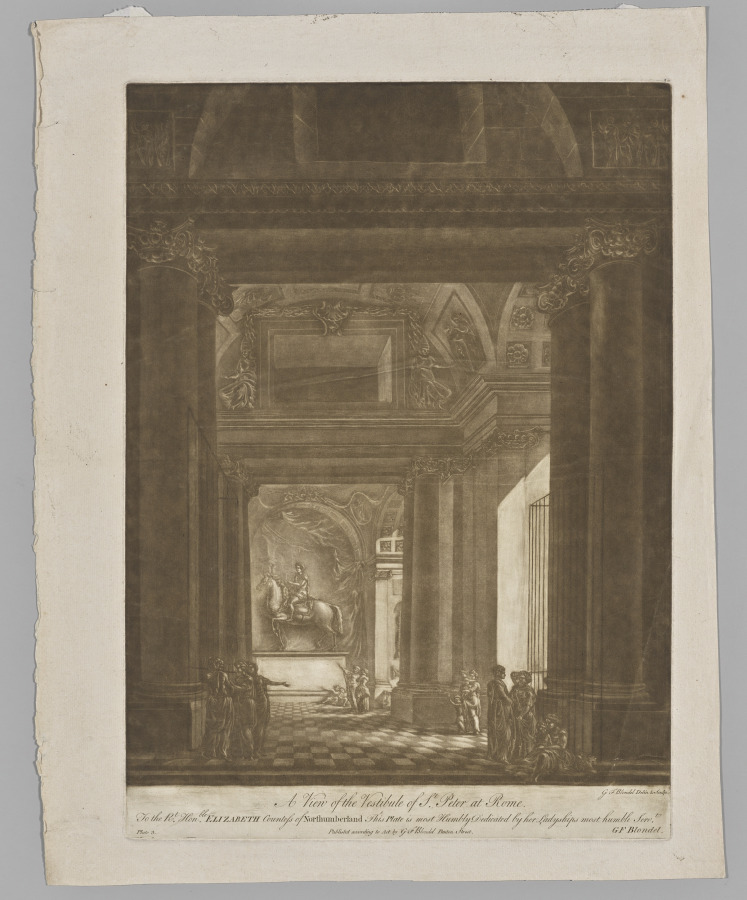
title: A View of the Vestibule of St. Peter at Rome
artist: Georges Francois Blondel (French, 1730–1800)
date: 1766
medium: mezzotint printed in sepia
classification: Print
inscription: Imprinted on recto: “A View of the Vestible ulf St. Peter at Rome”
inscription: Imprinted on recto: “G F Blondel Delin & Sculp”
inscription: Imprinted on recto: “To the Rt Hon’ble Elizabeth Countess of Northumberland This Plate is most Humbly Dedicated by her Ladyships most humble serv’t/Published according to Act by G F Blondel Panton Street/G F Blondel/Plate 3”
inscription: Watermark: Grand-Jésus stock of T. Dupuy, watermark Name of Jesus (IHS), countermark T Dupuy Fin Auvergne 1742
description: After returning from several years spent in Italy, the French printmaker George-Francois Blondel settled in London in order to take advantage of the English taste for images of Italian sites. This is one of a series of eight prints he published in 1766 depicting imagined and real Italian interiors. Using the relatively new technique of mezzotint, which creates velvety, dark tonal areas, as well as low vantage points, Blondel created towering, awe-inspiring spaces. For special patrons, he printed the plates in sepia ink, rather than in black; the CMA’s set includes two of these unusual sepia impressions.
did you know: Mezzotint was relatively new at the time this print was made and had yet to be utilized for such large plates of an architectural nature as seen here.